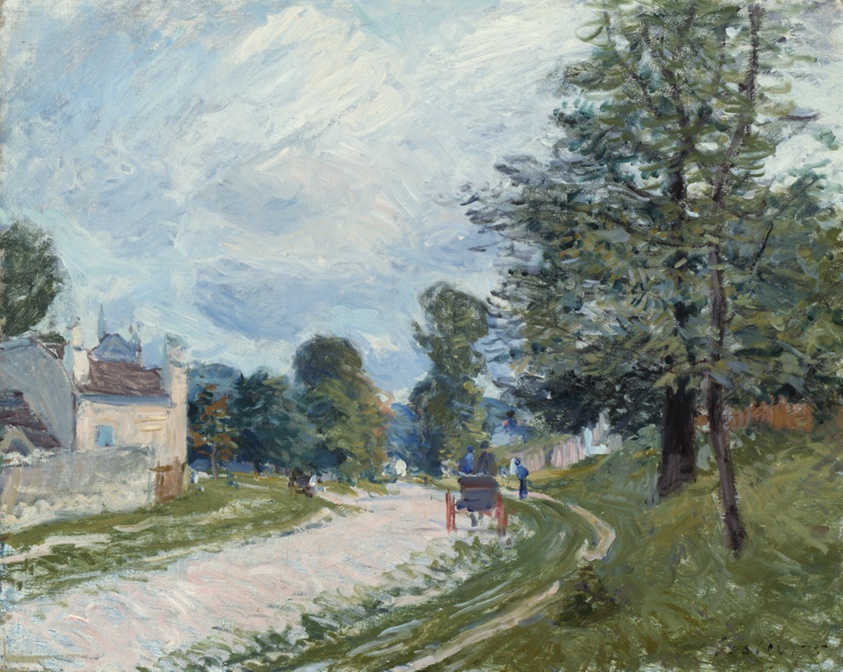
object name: Painting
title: A Turn in the Road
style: Impressionism, nineteenth century, 19th century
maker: Alfred Sisley (French, 1839–1899)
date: 1873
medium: Oil on canvas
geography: France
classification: oil on canvas; painting; paint; oil paintings (visual works); french; european painting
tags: landscape, carriage, people, wall, fences, gates, building, buildings, figures, weather/seasons, trees, sky, road, paths, nature, France, clouds